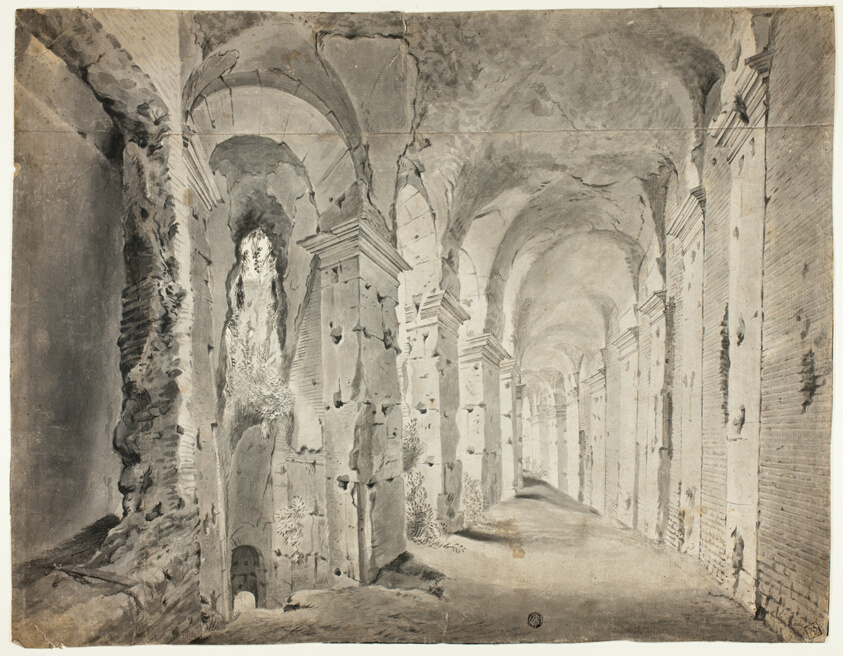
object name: Drawing and Watercolor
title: Large Ruined Portico or Corridor (recto); Sketches of a Draped Figure and Architecture (verso)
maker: School of Paul Bril (Flemish, 1554-1626)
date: c. 1600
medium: Brush and black ink, with black wash (recto), and red and black chalk (verso), on pieced cream laid paper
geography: Flanders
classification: ink or chalk wash; drawings (visual works); prints and drawing